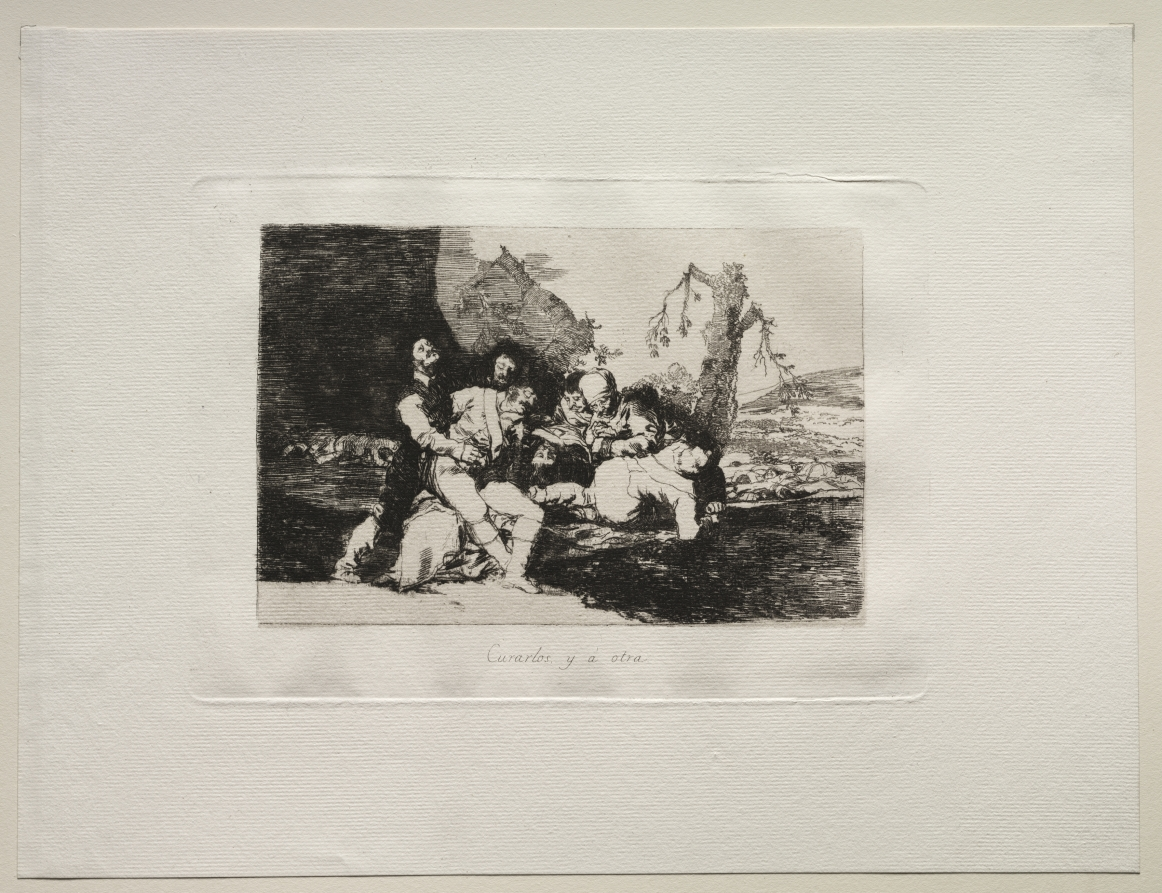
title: The Horrors of War: Get them Well and On to the Next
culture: Spain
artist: Francisco de Goya (Spanish, 1746–1828)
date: c. 1810–20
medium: etching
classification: Print